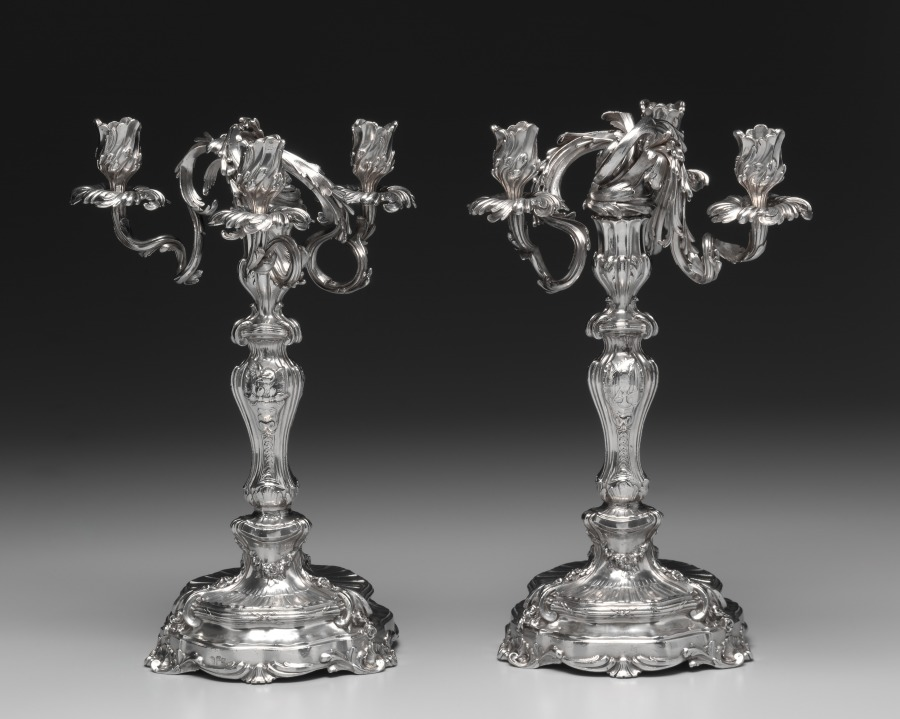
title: Candelabrum Pair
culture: France, Paris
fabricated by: François Thomas Germain (French, 1726–1791)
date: 1757–1758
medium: silver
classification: Silver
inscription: on base: Fait par F. T. Germain sculpr offre du roy aux galleries du Louvre a Paris 1758.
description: This pair of candelabras were one small part of the Parisian Service, an enormous silver dinner set commissioned by Empress Elisabeth of Russia. This revival of artistic relationships between France and Russia towards the end of her reign was connected to her policy of reconciliation with the French Royalty. Though Elisabeth died before seeing the complete service delivered from Paris to Saint Petersburg it continued to be used well into the reign of Catherine II.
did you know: These candelabra are part of a dinner service sent from Paris, France to Saint-Petersburg, Russia in two separate shipments, the first of which contained 270 objects for 8 dozen place settings.